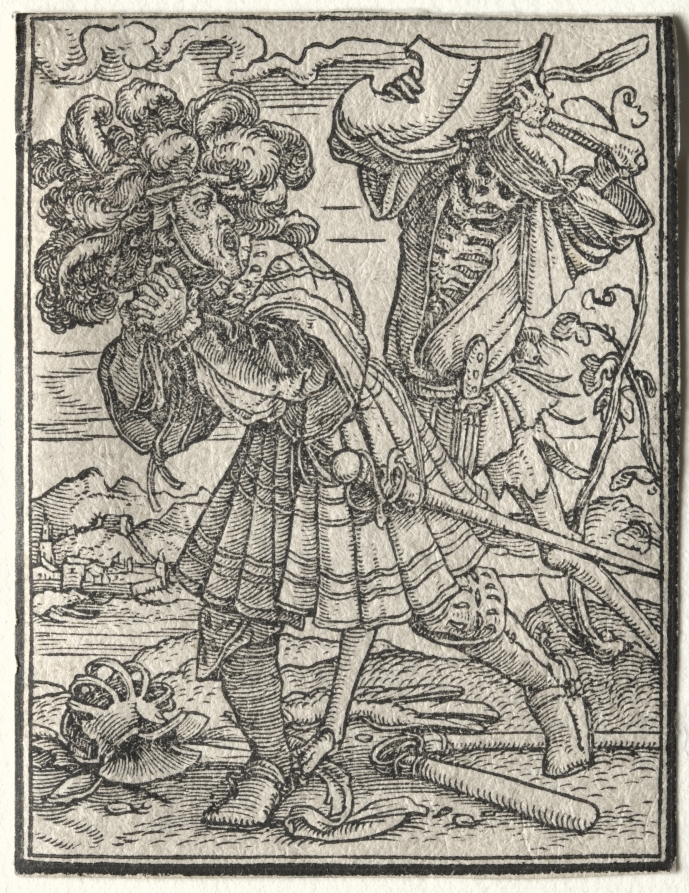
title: The Dance of Death: The Count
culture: Germany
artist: Hans Holbein the Younger (German, active England and Switzerland, 1497/98–1543)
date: c. 1526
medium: woodcut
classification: Print